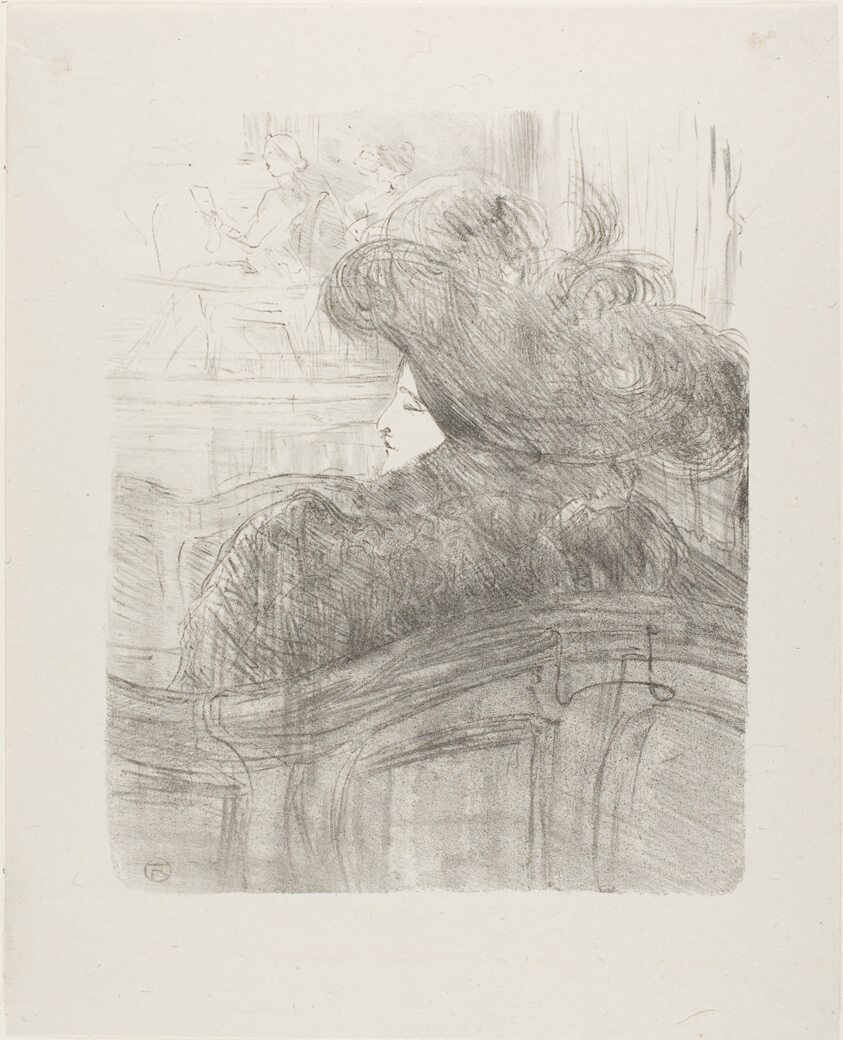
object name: Print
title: Cléo de Mérode, from Treize Lithographies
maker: Henri de Toulouse-Lautrec (French, 1864-1901)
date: 1898, published before 1906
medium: Lithograph in black on ivory laid paper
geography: France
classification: lithograph; print; prints and drawing